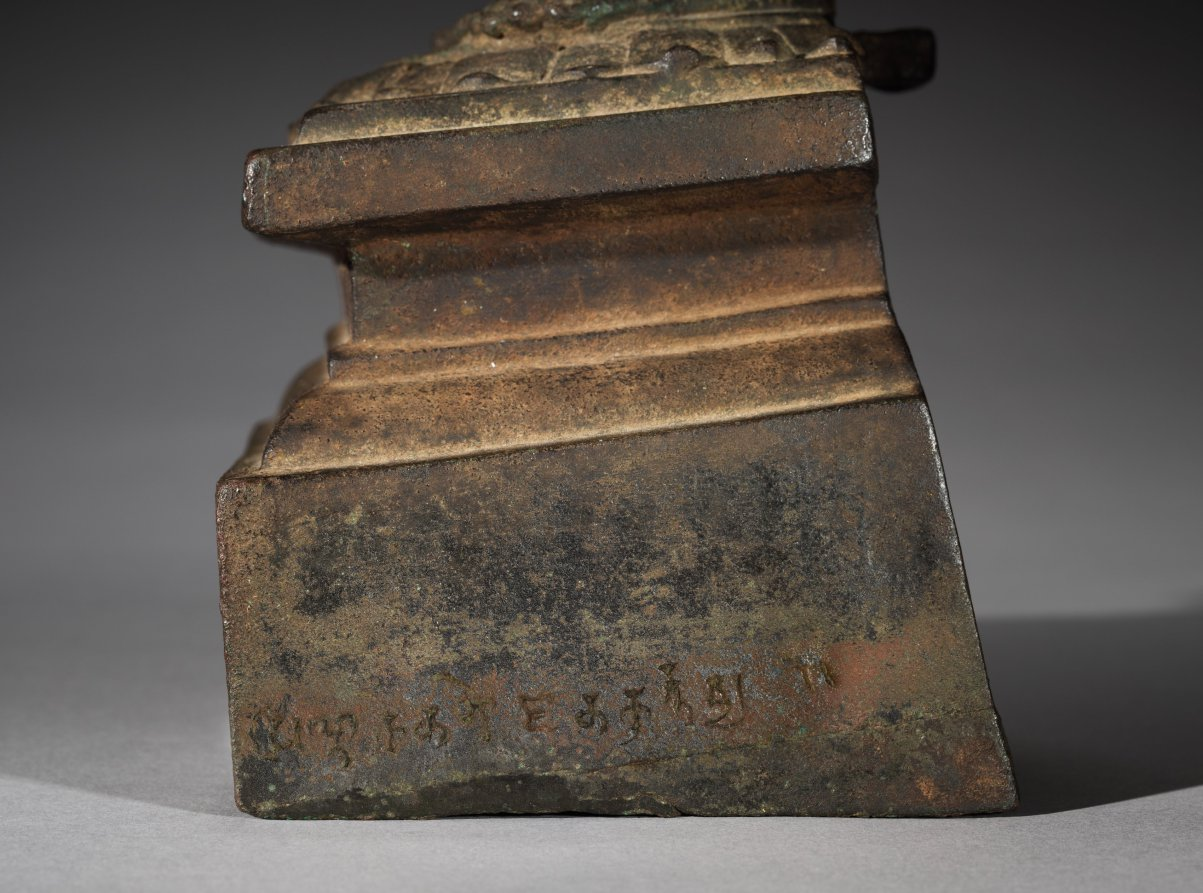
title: Standing Buddha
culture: Northern India, Uttar Pradesh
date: 591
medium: bronze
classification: Sculpture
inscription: 1. ṹ deyadharmmoyaṃ laḍitagrāme yaṃgvalvihāre śā[kya] bhikṣuṇyā 2. pariśuddhamatyā yadattra puṇyaṃ tadbhavatu sarvvasatvānā- 3. manuttarasarvva jñānāvāptaye/ / saṃvat 4a. 500 10 3/ / caityakūta jinabandhuvihārapūrvva-bhuddeśe 4b. piṇḍakena bhojanaṃ karttavya*/ / *Mistake for karttavyam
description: This bronze Buddha is exceptional, because it carries an inscription on its base that dates its manufacture to the year 591. According to the inscription, the sculpture was dedicated by a nun who was from a village in Nepal, but she probably commissioned it at a workshop in northern India. The Buddha's robe on this image has been left plain, without pleat lines to obscure the beauty of the contours of the body. Only the rippling scalloped clusters of the garment’s hem lend some sense of energy and subtle ornament to the composition.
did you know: Around the time when this sculpture was made, portable bronzes began to replace relics as the principal sacred commodity circulating in the Buddhist world.